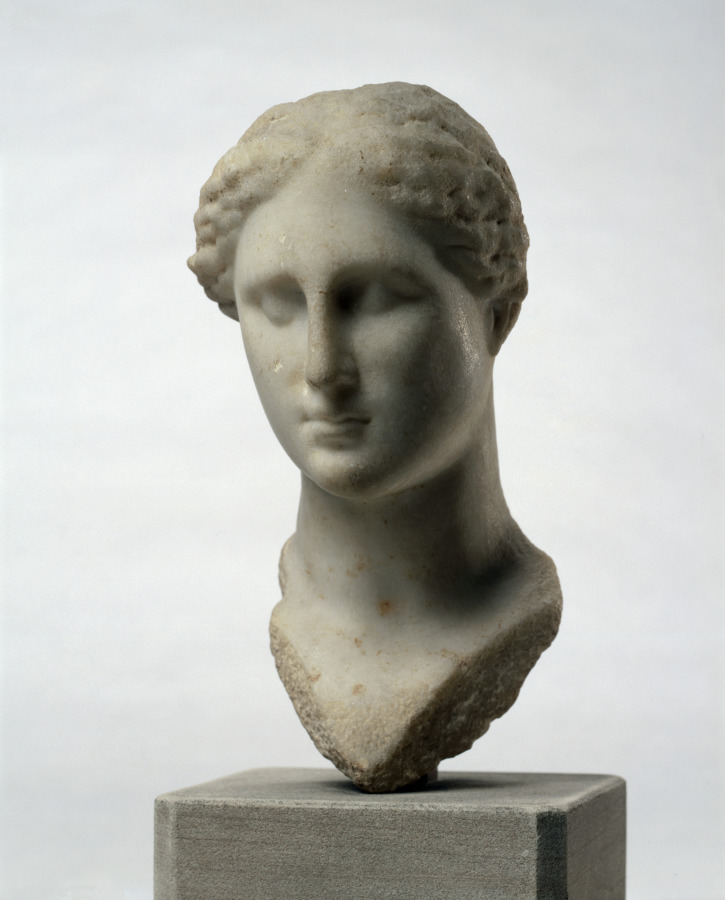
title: Head of Aphrodite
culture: Greece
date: 325–100 BCE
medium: marble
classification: Forgery